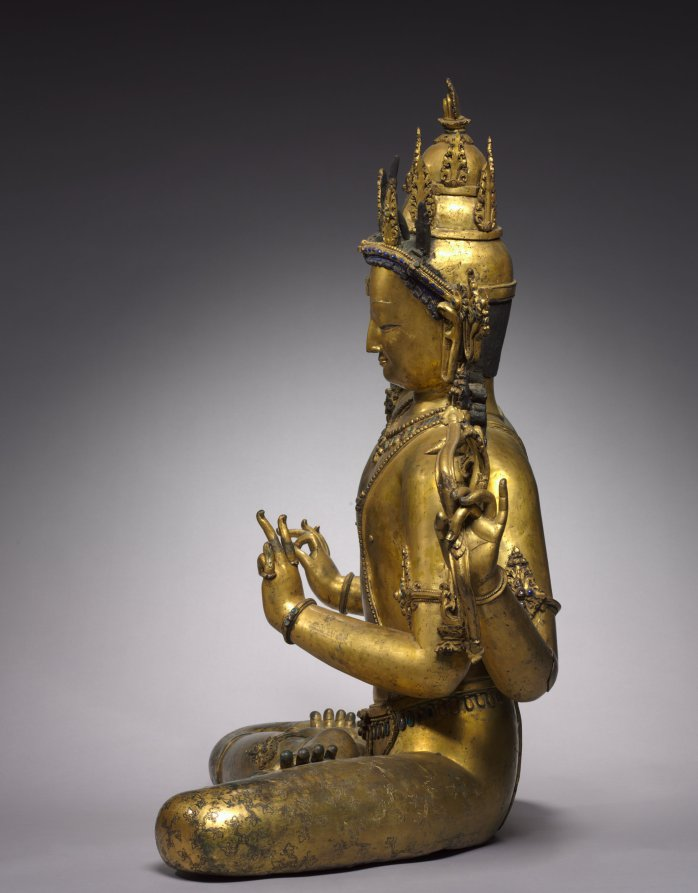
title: Bodhisattva of Wisdom (Manjushri)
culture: Nepal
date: 1400s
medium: Gilt bronze with precious and semiprecious stones, gum tempera, and cold gold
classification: Sculpture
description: This image depicts one of the main bodhisattvas, beings only one stage away from full enlightenment. Because the historical Buddha was a prince prior to his renunciation and life as a wandering ascetic, bodhisattvas are depicted as royal princes. This example has the sharp features, sweet expression, and crisp details characteristic of images made in Nepal during the 1400s. In his upraised right hand Manjushri holds the hilt of a sword that, like wisdom itself, metaphorically cuts through and defeats ignorance. His lower, rear left hand grasps a bow, once probably strung with a wire. Also missing is the arrow that he likely held in his lowered right hand. Arrows were often symbols for mantras, or strings of syllables thought to have the power to focus the mind and work like missiles to destroy negativity and affliction. The gesture of his lowered left hand indicates the transmission of Buddhist teachings. The lotus stem that rises at the left elbows originally held a book of sutras. This figure is in the yogic posture of meditation with the big toe flexed in concentration. Yoga is of central importance in tantric Buddhism, because high-level practitioners are able to discipline the body to such an extent that the mind can also be controlled.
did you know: The bodhisattva's short breeches are patterned in spiraling floral forms incised into the metal.